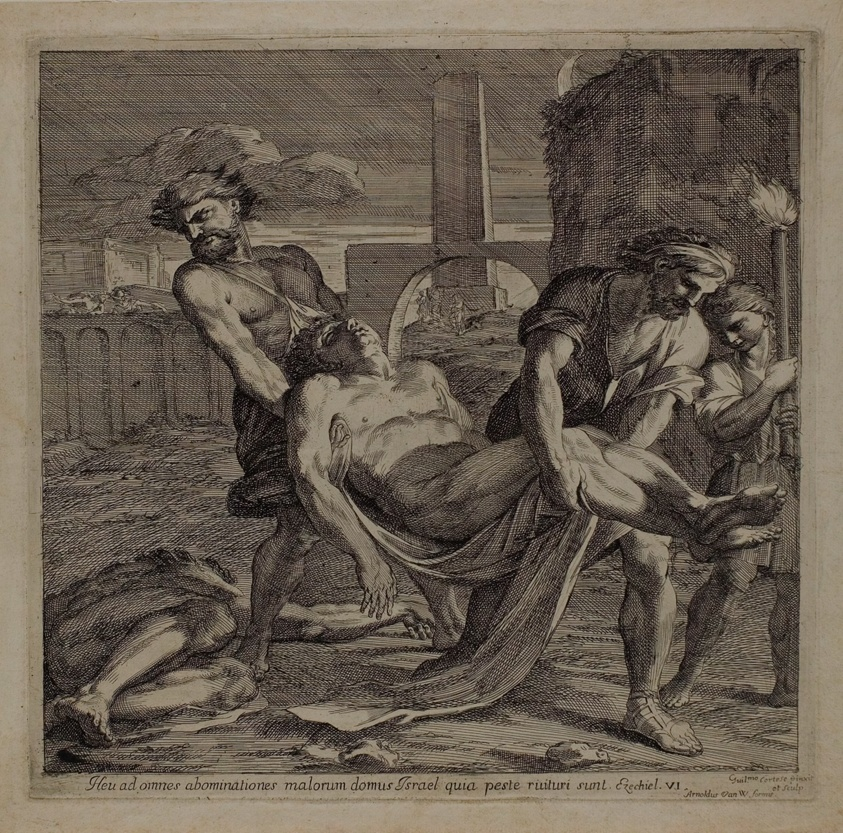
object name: Print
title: Saints Abdon and Sennen Bury the Remains of Christian Martyrs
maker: Guillaume Courtois (French, 1628-1679)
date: 1656/57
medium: Etching on tan laid paper; verso graphite sketch of Saint's head traced from recto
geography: France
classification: etching; print; prints and drawing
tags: Christian subjects, mythology, prints and drawings, saints, martyrs